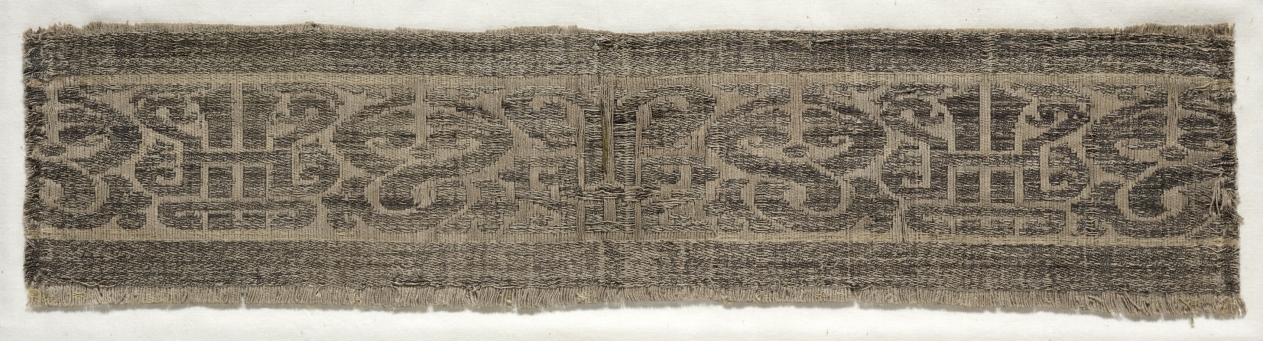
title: Fragment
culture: Spain, Mudejar, 13th century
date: 1200s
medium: compound twill weave: silk and gold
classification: Textile